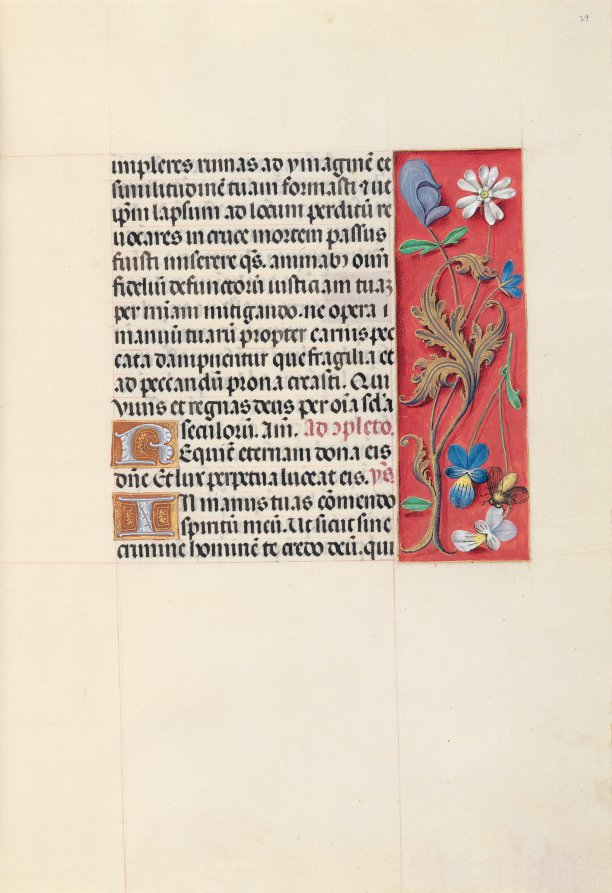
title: Hours of Queen Isabella the Catholic, Queen of Spain: Fol. 29r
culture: Flanders, Ghent and Bruges, late 15th century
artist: Master of the First Prayerbook of Maximillian (Flemish, c. 1444–1519)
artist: and Associates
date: c. 1500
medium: ink, tempera, and gold on vellum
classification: Bound Volume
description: A great lover of Flemish art, Queen Isabella treasured her many devotional books. This deluxe manuscript was created for her private devotions by highly organized and distinctly talented manuscript painters active in Ghent and Bruges. The Ghent-Bruges school represents the culmination of Flemish book painting, whose main features were the use of rich colors, illusionistic effects, a love of landscape, and a strong sense of visual narrative. Manuscripts produced by this circle of artists are renowned for their border decoration featuring a rich variety of realistically painted flowers, scrolling acanthus leaves, birds, and butterflies.